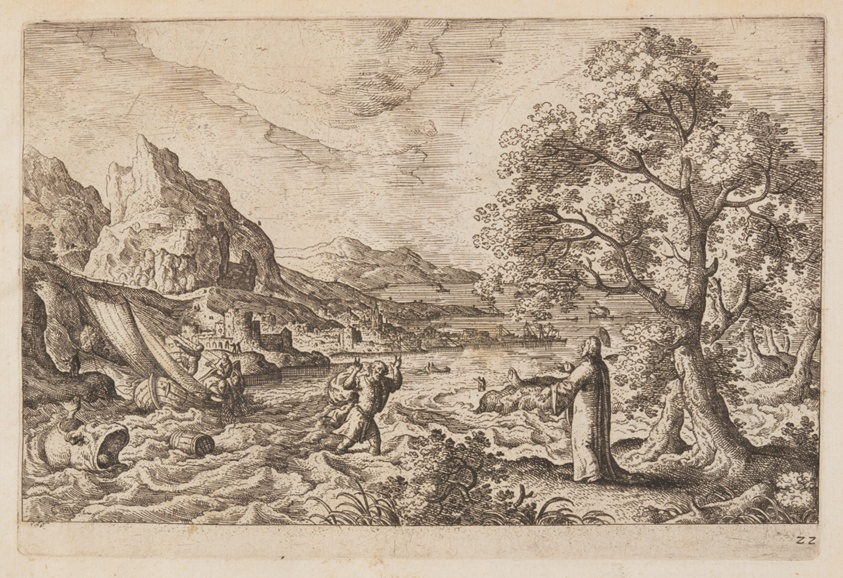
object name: Print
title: Plate 22, from Landscapes with Scenes from the Old and New Testament and Ovid’s Metamorphoses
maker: Hans Bol (Flemish, 1534–1593); published by Philip Galle (Flemish, 1537–1612)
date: 1574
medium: Etching on ivory laid paper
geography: Flanders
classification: print; paper; prints and drawing; etching